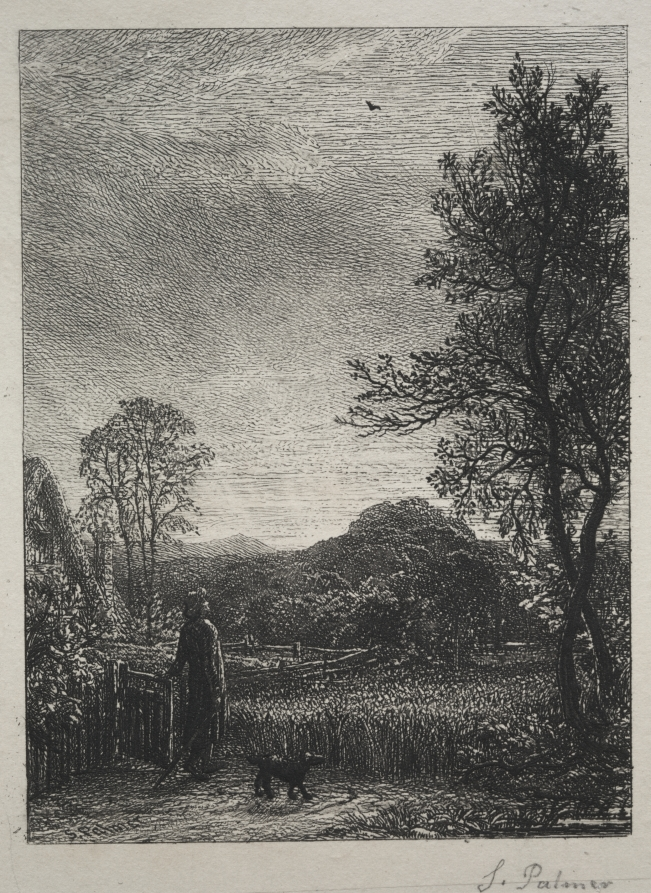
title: The Skylark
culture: England, 19th century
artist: Samuel Palmer (British, 1805–1881)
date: 1850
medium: etching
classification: Print